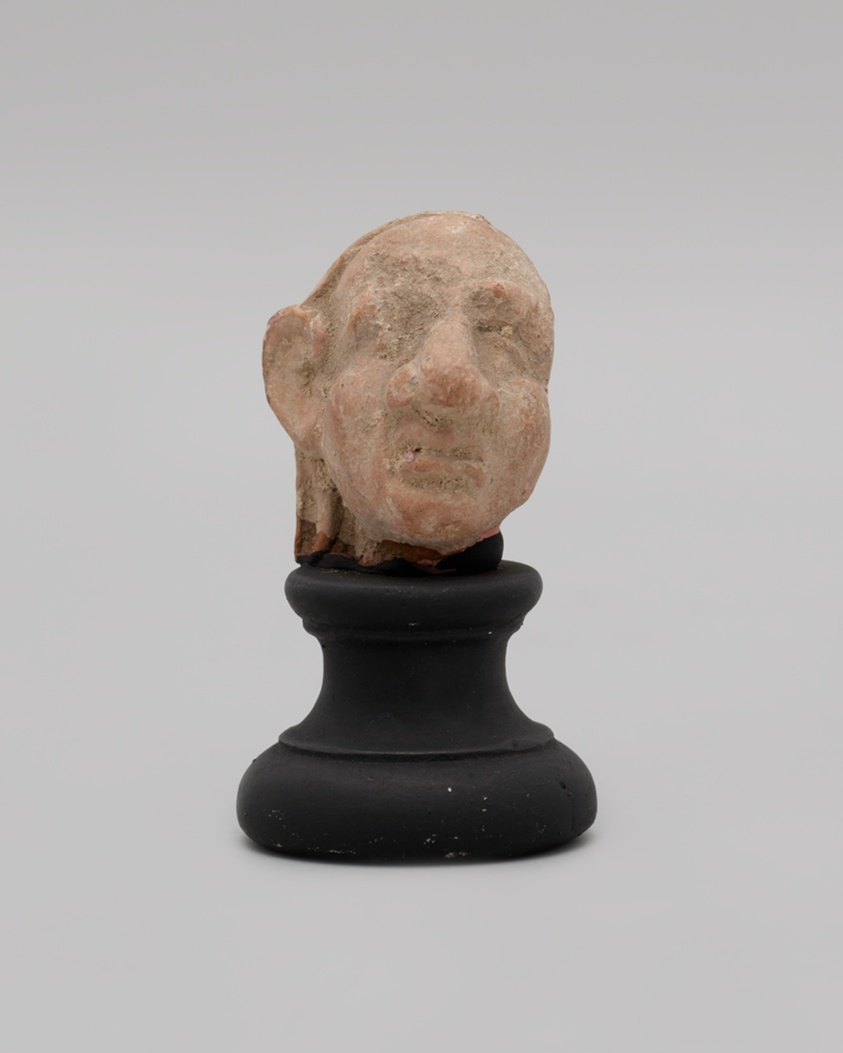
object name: Sculpture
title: Head of a Man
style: greek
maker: Greek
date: 2nd-1st century BCE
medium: terracotta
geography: Greece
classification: earthenware; ceramics; sculpture; ancient art